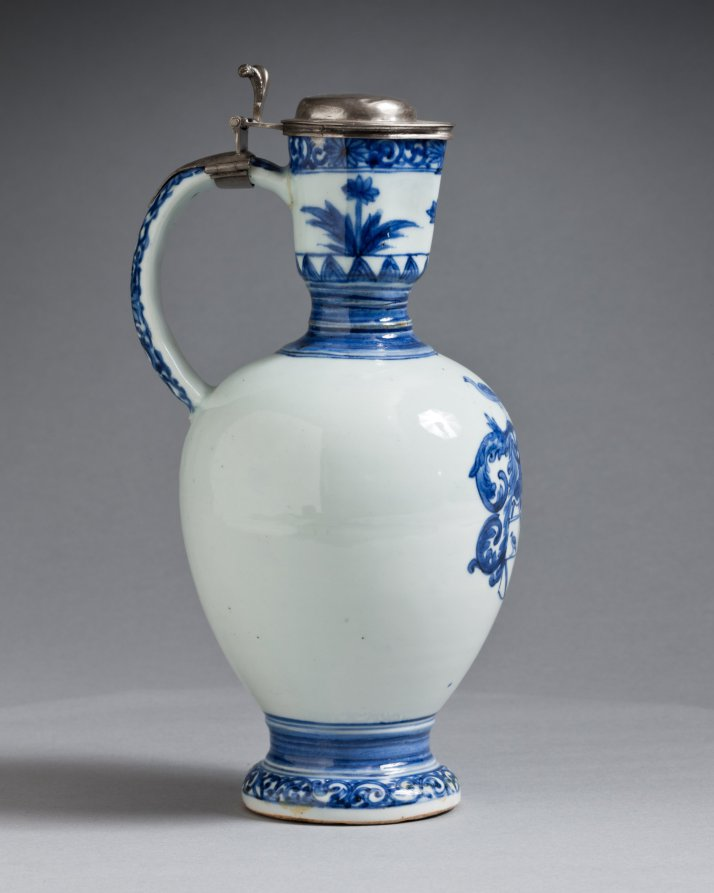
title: Jug with Silver Mounts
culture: Japan, Edo period (1615–1868)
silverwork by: Barent van Leeuwen (Dutch, 1637–1682)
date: c. 1662–76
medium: porcelain with underglaze blue decoration and silver mounts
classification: Ceramic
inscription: [on silver]: town mark for Amsterdam; lion rampant crowned (alloy mark for 0-934 silver); d (date letter for 1666), maker's mark of Barent van Leeuwen.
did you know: The coat of arms on this jug are those of the Valckenier family, active in the Dutch East India Company.